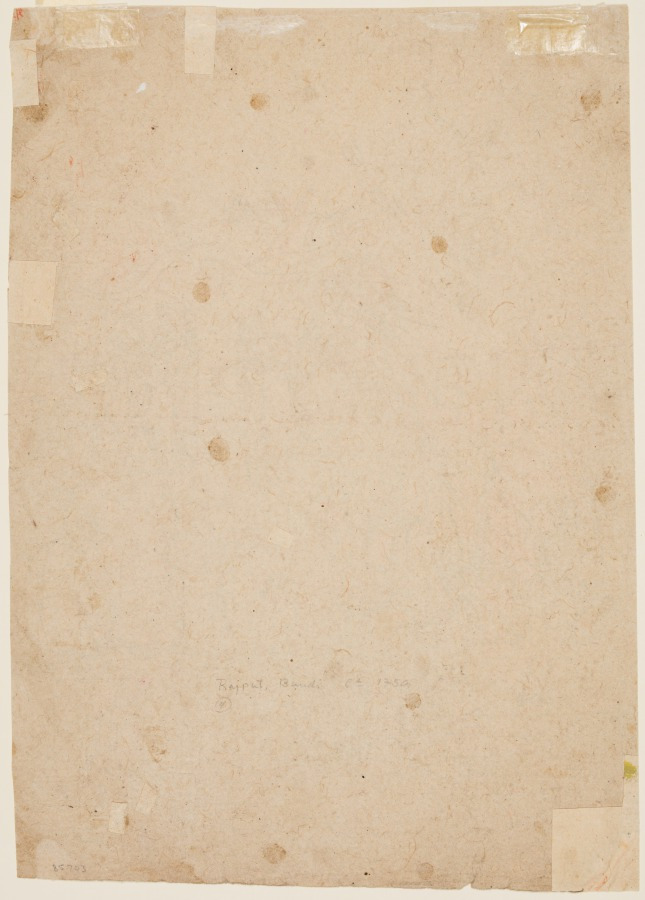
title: Krishna watches the milkmaids circumambulating a sacred tree: The month of Jyestha (May–June), from a Barahmasa (The Twelve Months)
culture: Northwestern India, Rajasthan, Rajput Kingdom of Bundi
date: c. 1760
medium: gum tempera on paper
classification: Painting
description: On the day of Jyestha Purnima, having fasted for three days, married women worship the banyan tree by circumambulating it. The goal of this ritual is to ask for a long life for their husbands. The milkmaids (gopis), having already accepted Krishna as their supreme master, are praying for his well-being, while he observed the ritual from behind the plantains.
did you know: The birds and monkeys sitting around the tree are depicted in pairs, like loving couples.